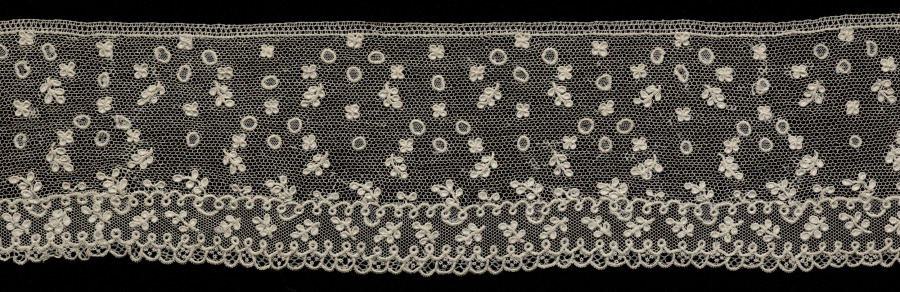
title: Lace Edging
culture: France, Alençon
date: 1760–99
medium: Needle lace (Point d'Alençon)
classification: Lace